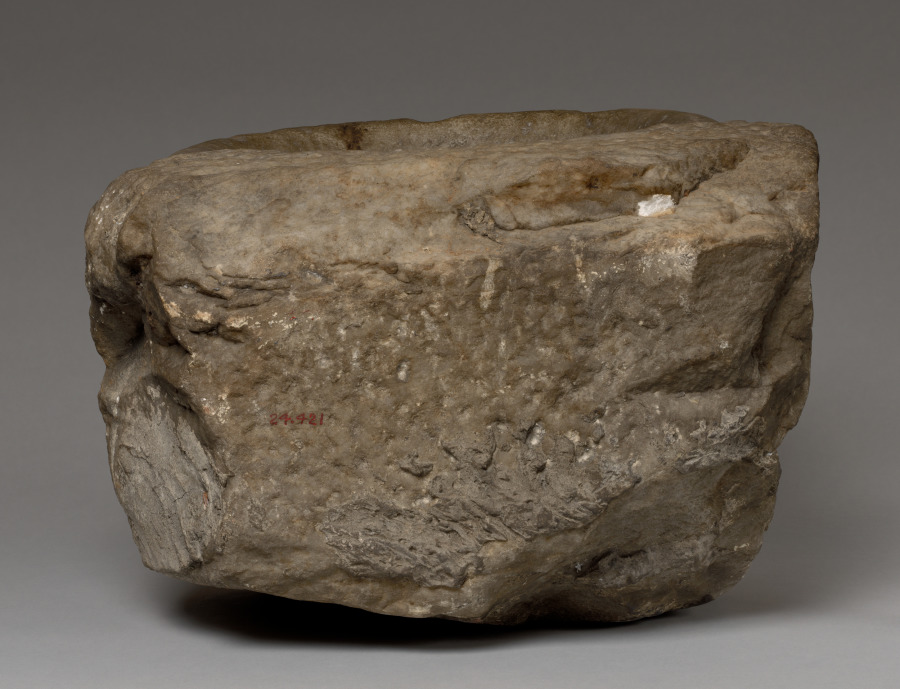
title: Holy Water Font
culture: Southern France, late 15th century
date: late 1400s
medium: marble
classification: Sculpture